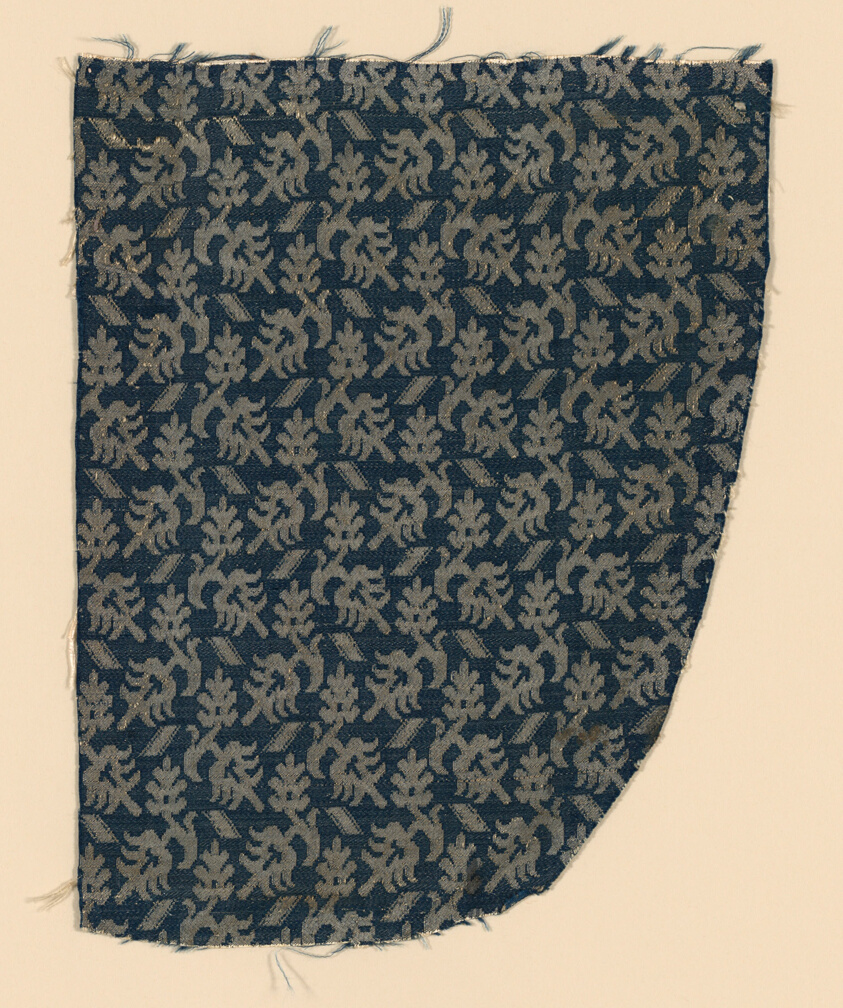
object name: Textile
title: Fragment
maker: Italy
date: 1600/50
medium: Simple satin damask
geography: Italy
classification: textile; weaving